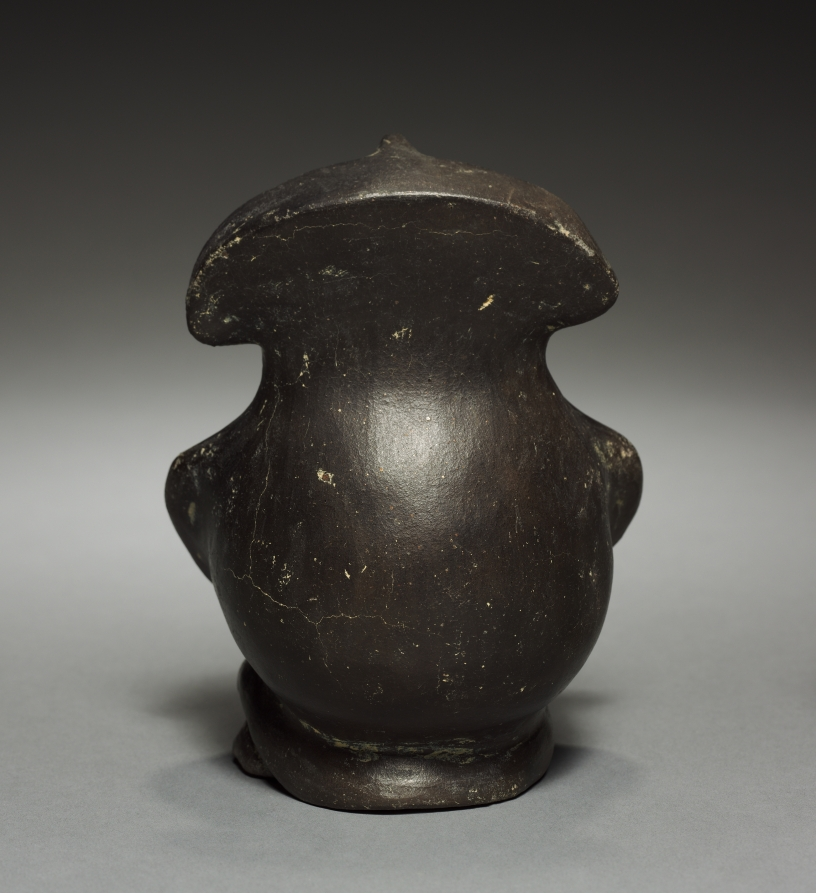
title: Figurine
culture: Colombia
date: before 1921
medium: pottery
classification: Ceramic